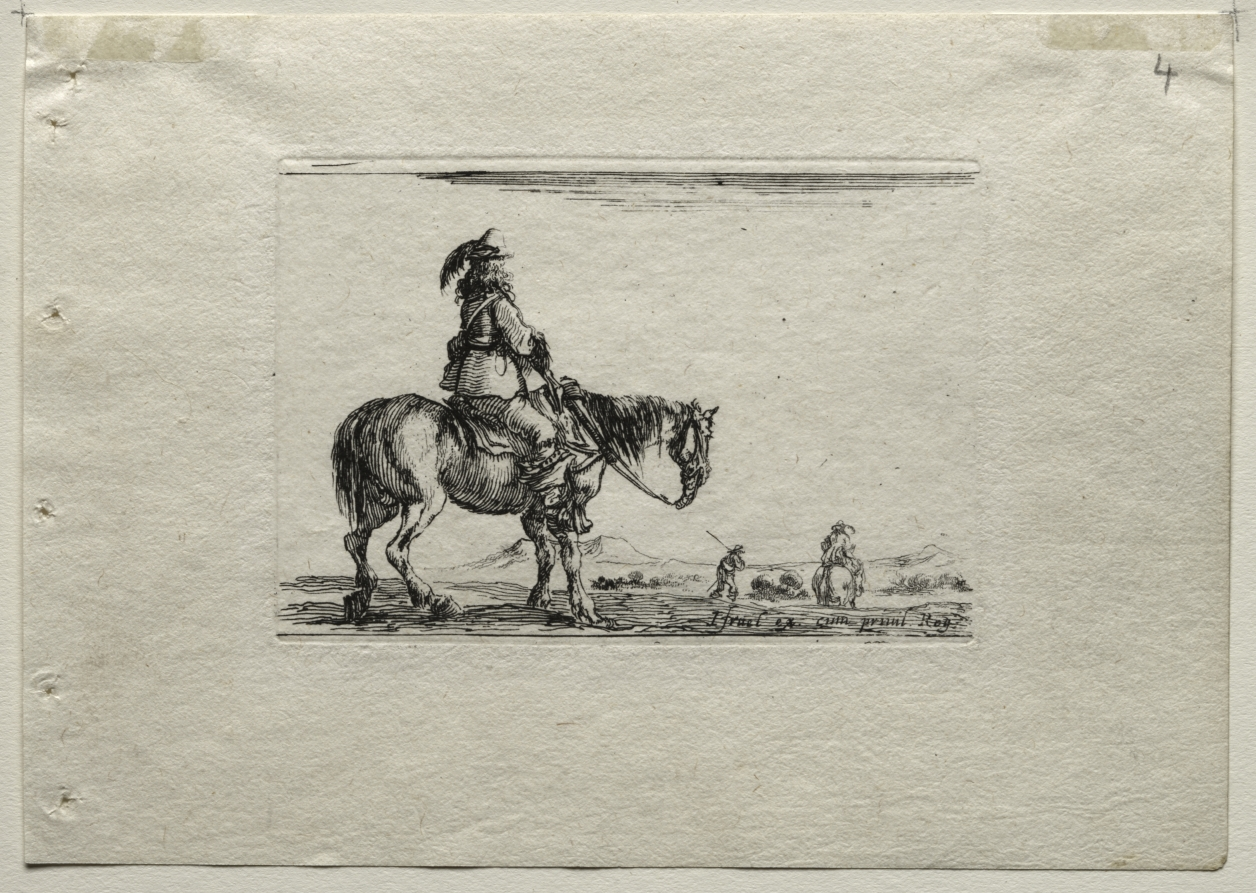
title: Caprices: Mounted Cavalier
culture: Italy, 17th century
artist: Stefano Della Bella (Italian, 1610–1664)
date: c. 1642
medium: etching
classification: Print